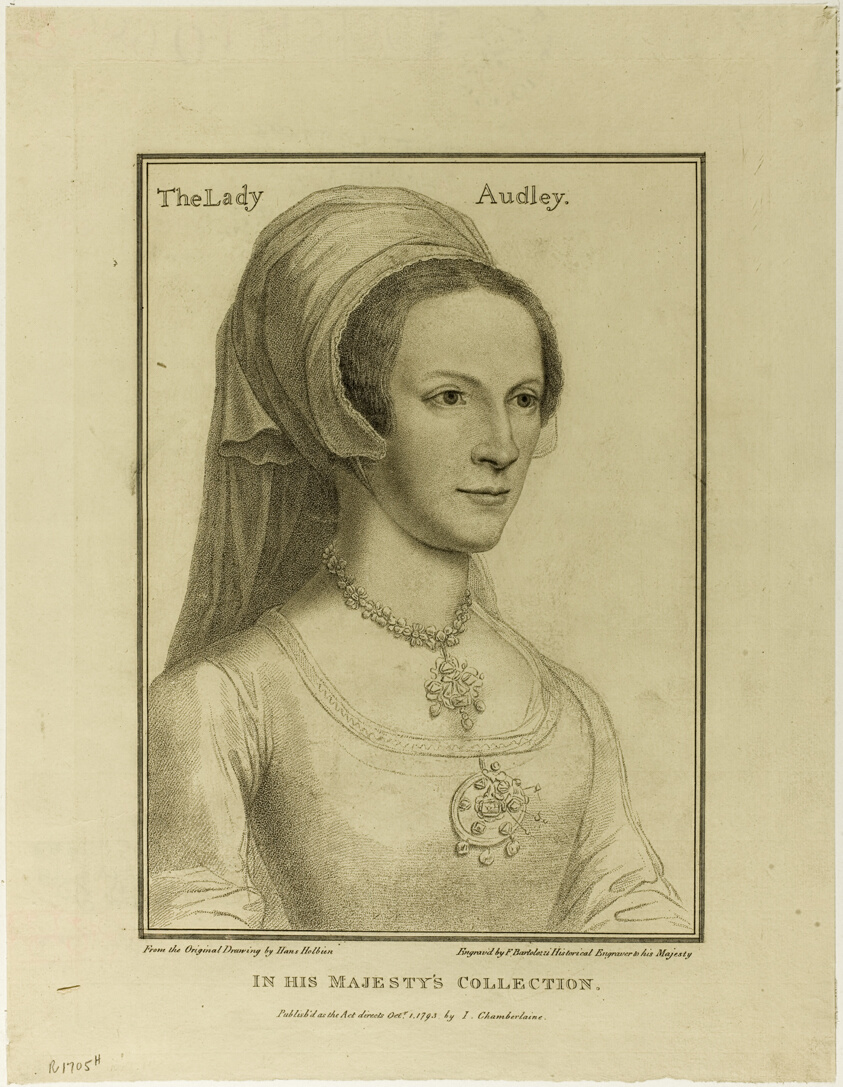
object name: Print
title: Lady Audley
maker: Francesco Bartolozzi (Italian, 1727-1815); after Hans Holbein the younger (German, 1497-1543)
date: October 1, 1793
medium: Stipple engraving on cream wove paper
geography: Italy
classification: engraving; print; prints and drawing